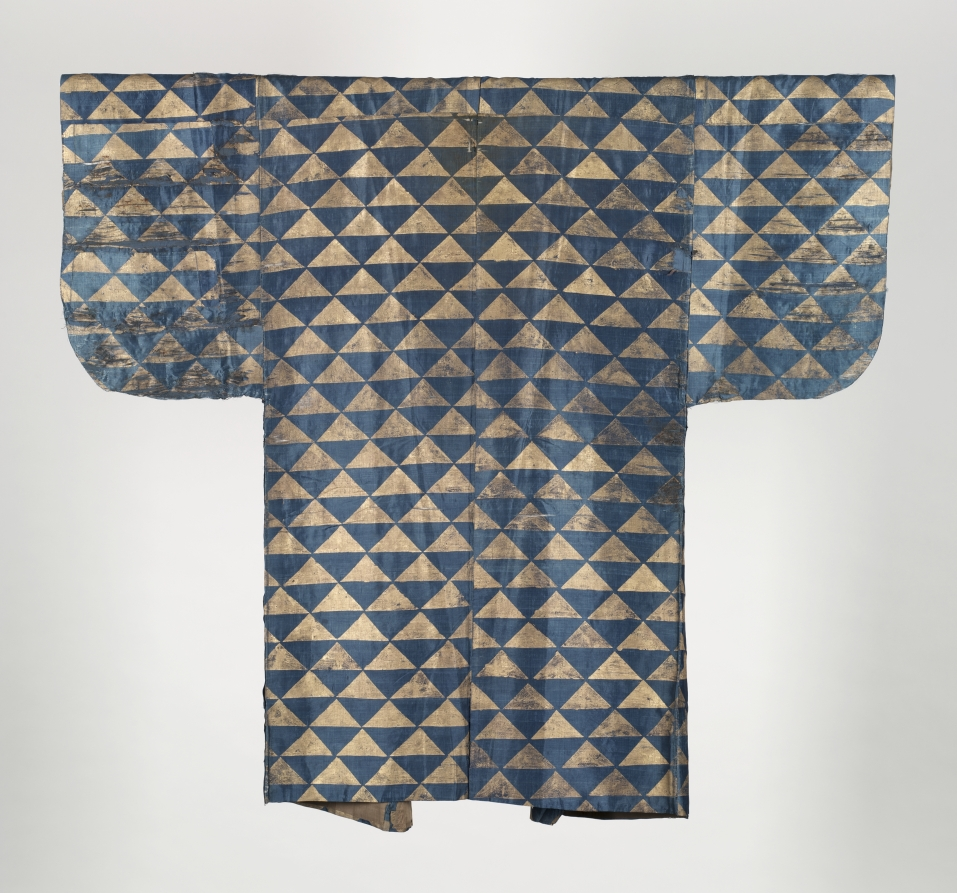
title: Noh Costume (Surihaku) with Fish-Scale Pattern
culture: Japan, Edo period (1615–1868)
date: 1800–1850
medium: plain weave silk; metal thread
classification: Garment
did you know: Surihaku means patterns of gold or silver leaf affixed with paste to a plain-colored background.